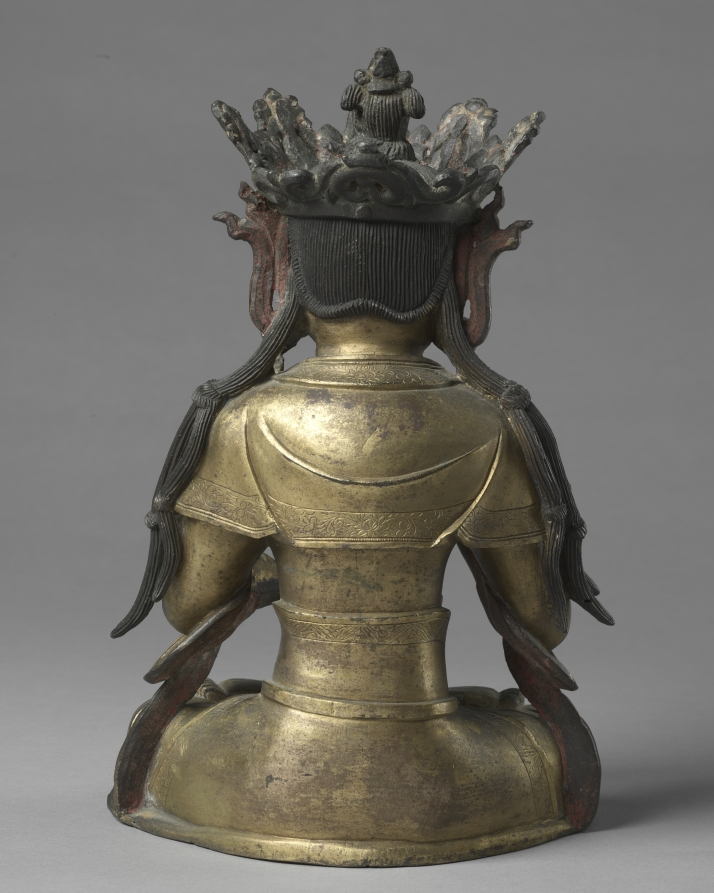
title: Seated Guanyin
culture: China, Ming dynasty (1368–1644)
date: 1368–1644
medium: gilt bronze with polychromy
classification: Sculpture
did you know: This bronze sculpture was created using the lost wax method of casting.